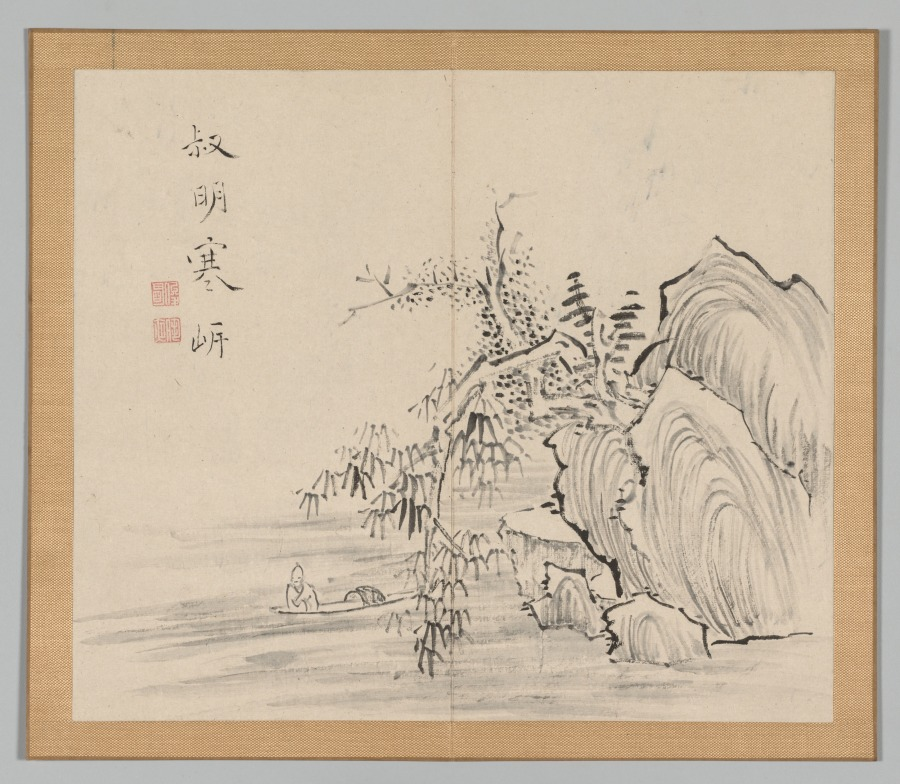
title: Reverberations of Taiga, Volume 2 (leaf 10)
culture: Japan, Edo period (1615–1868)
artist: Aoki Shukuya (Japanese, d. 1802)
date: mid- to late 1700s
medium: double-leaf from a pair of albums; ink and light color on paper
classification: Portfolio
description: Traditionally, young painters in Japan began their studies with an established master-painter. The master's compositions invariably became models that the apprentice copied to learn various ink and brush techniques. Shukuya was a pupil of the famous Kyoto artist Ikeno Taiga, whose style is reflected in these sketches of rocks, trees, and mountains.